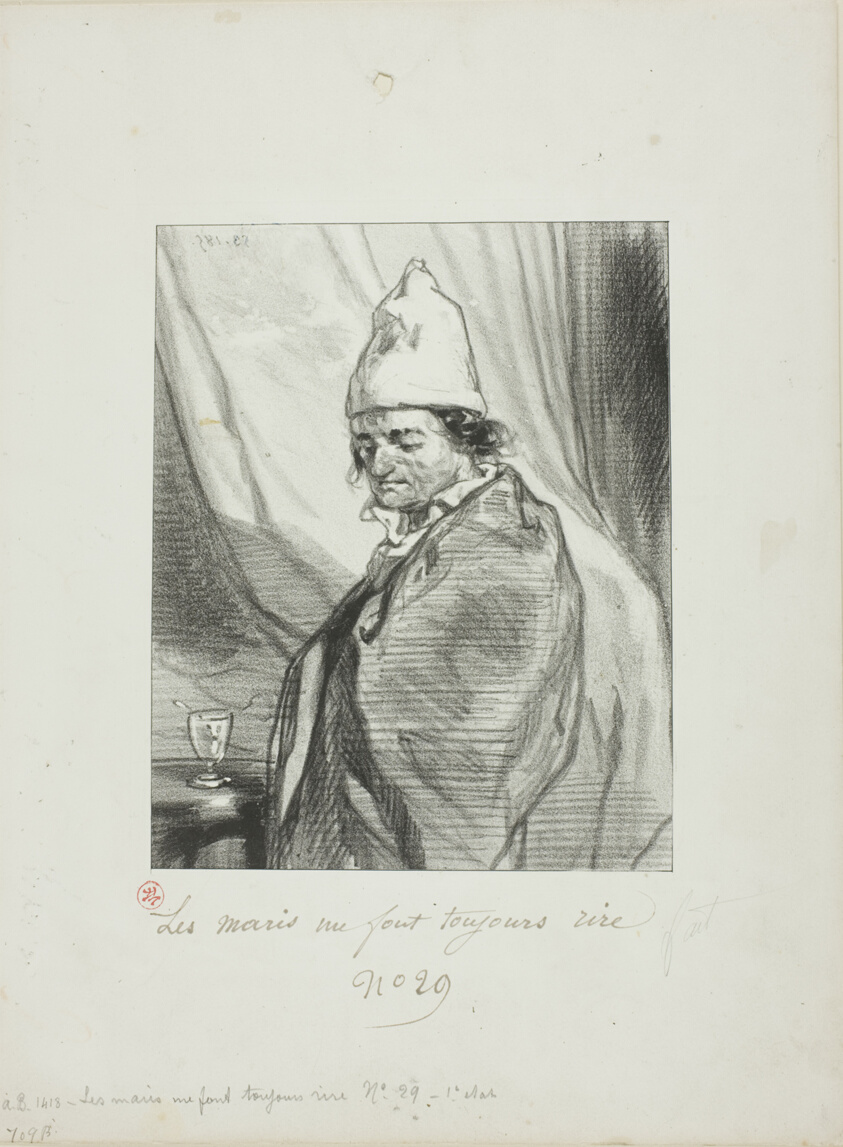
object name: Print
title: Husbands Always Make Me Laugh: Some say marriage settles a man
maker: Paul Gavarni (French, 1804-1866)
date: 1853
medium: Lithograph in black on cream wove paper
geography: France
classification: lithograph; print; prints and drawing